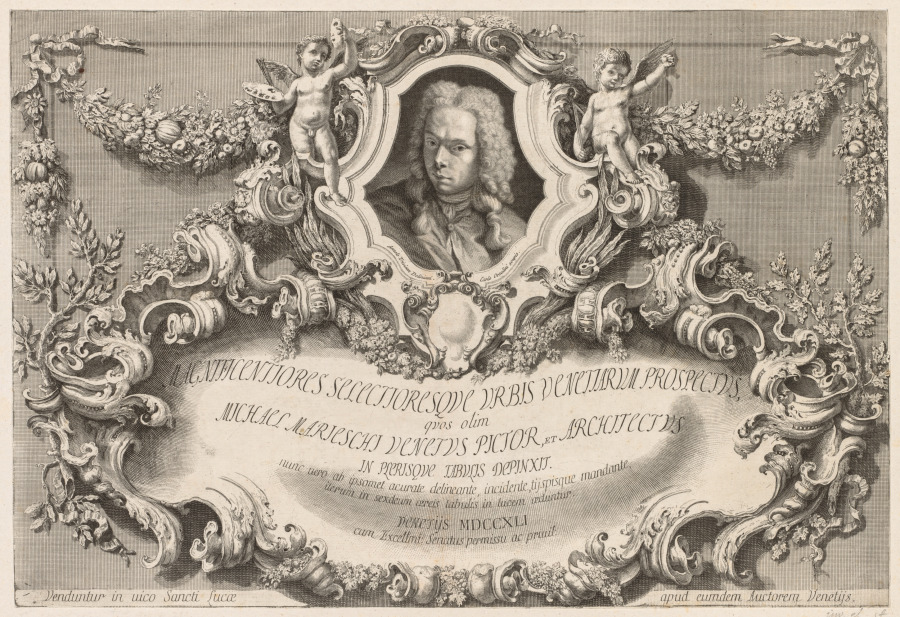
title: Views of Venice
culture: Italy, 18th century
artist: Michele Marieschi (Italian, 1710–1743)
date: 1741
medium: etching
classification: Print